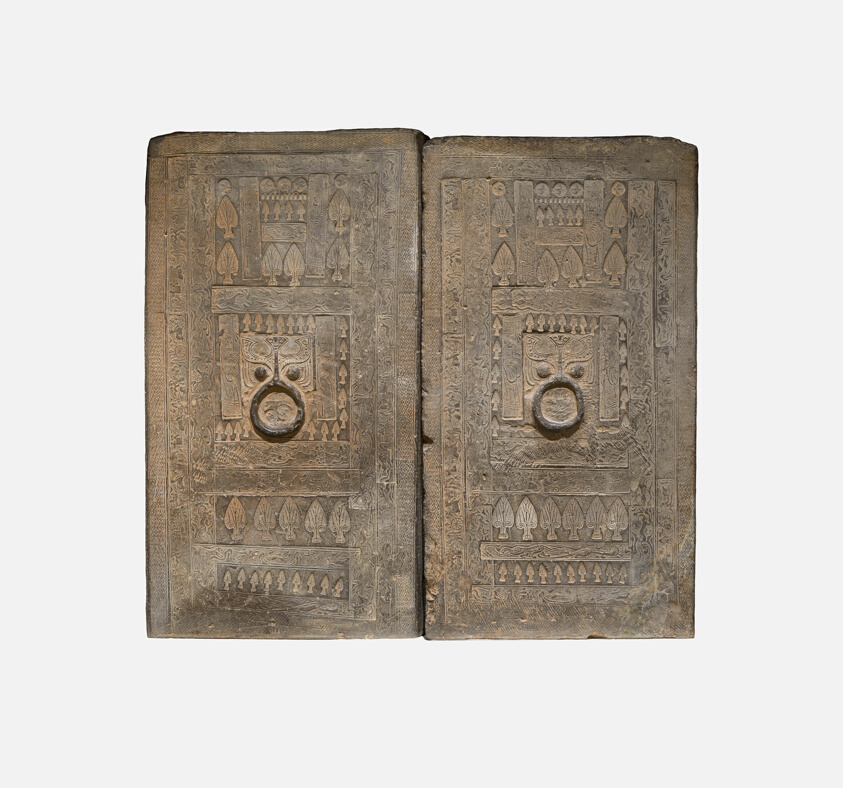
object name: Sculpture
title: Pair of Tomb Chamber Doors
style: Chinese (culture or style)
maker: China; probably from Zhengzhou, Henan province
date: Western Han dynasty (206 B.C.–A.D. 9), 1st century B.C.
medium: Gray earthenware with impressed and carved decoration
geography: China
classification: earthenware; architectural detail; ceramics; sculpture; asian art; architectural fragment